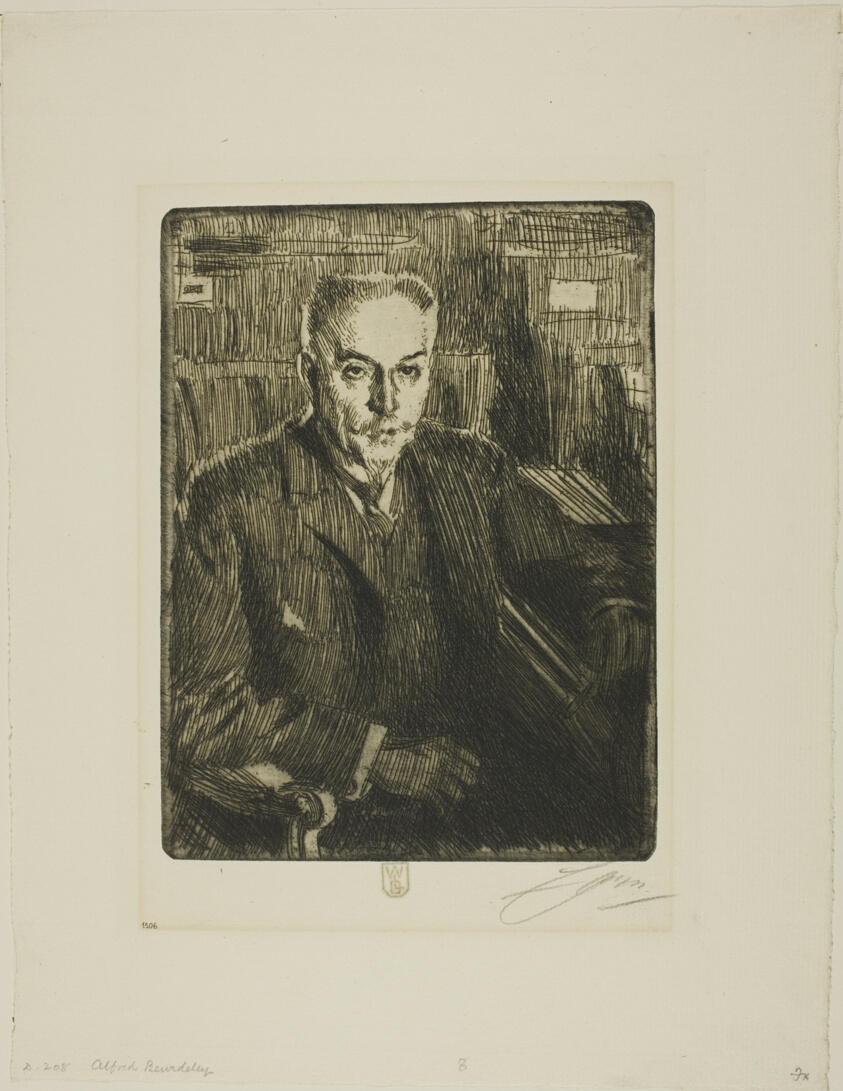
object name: Print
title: Alfred Beurdeley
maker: Anders Zorn (Swedish, 1860-1920)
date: 1906 or 1907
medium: Etching on ivory laid paper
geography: Sweden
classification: etching; print; prints and drawing